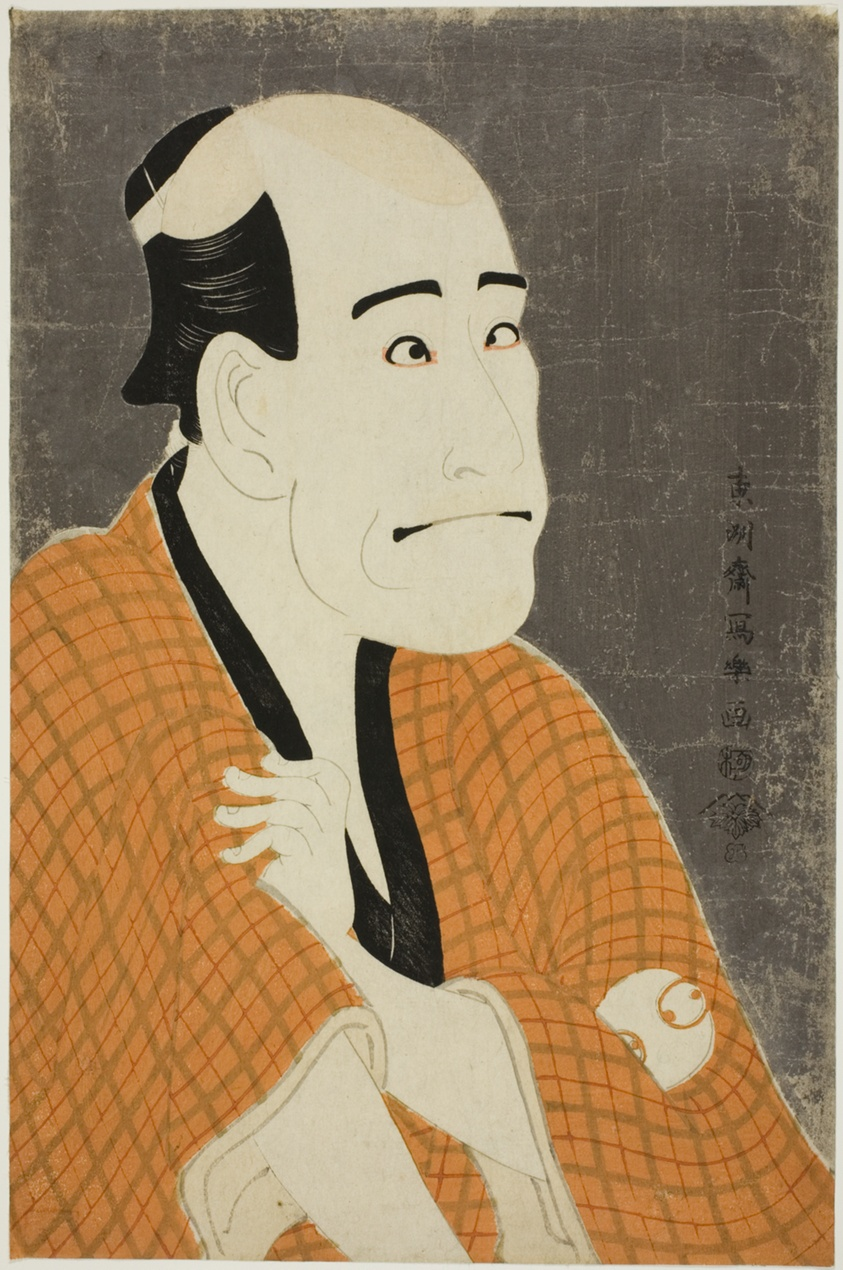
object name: Print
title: The actor Arashi Ryuzo II as Ishibe no Kinkichi, the moneylender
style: Japanese (culture or style)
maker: Toshusai Sharaku 東洲斎 写楽; Japanese, active 1794-95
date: 1794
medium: Color woodblock print; oban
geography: Japan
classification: woodblock print; print; asian art